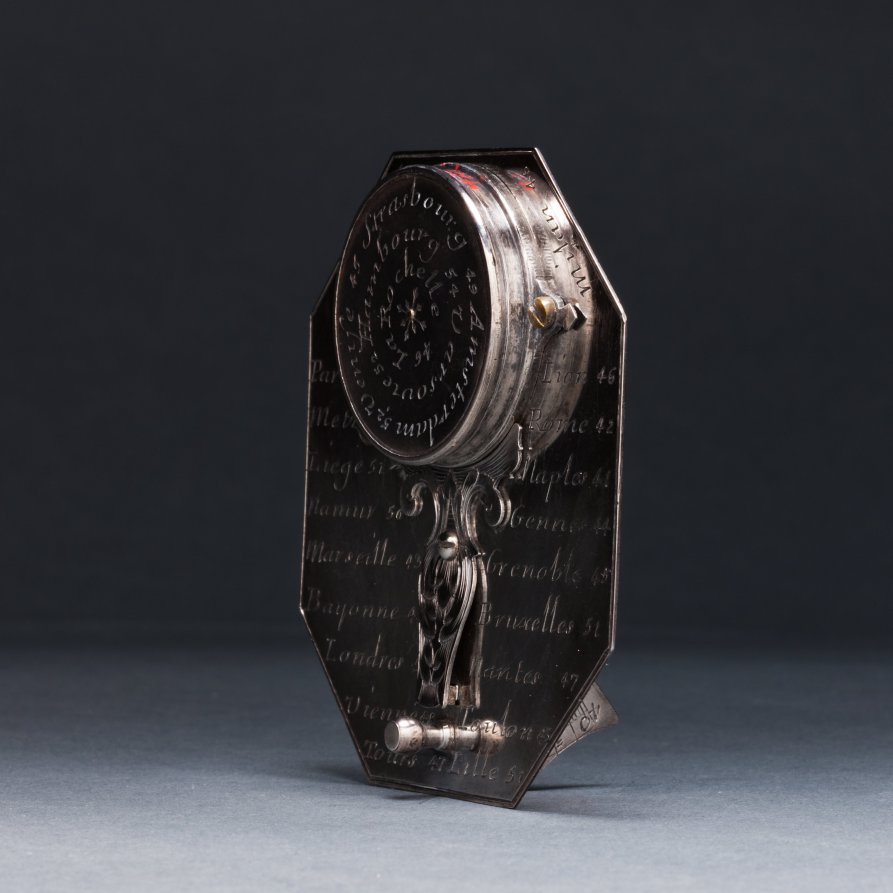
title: Butterfield Sundial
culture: France, 18th century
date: 1700s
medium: silver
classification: Silver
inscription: [Engraved signature above the compass in ribbon band]: "N. BION A Paris"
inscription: [Engraved on the face of the sundial]: “Pour 55° 4-5-6-7-8-9-10-11 50° IIII-V-VI-VII-VIII-IX-X-XI 45° 5-6-7-8-9-10-11 40° -VI-VII-VIII-IX-X-XI'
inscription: [Engraved on the other side]: "Pour 55° -8-7-6-5-4-3-2-1-0 50°-VIII-VII-VI-V-IIII-III-II-I 45°-8-7-6-5-4-3-2-1 40°-VII-VI-V-IIII-III-II-I"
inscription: [Engraved around the compass]: “NORD-OUEST-SUD-EST”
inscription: [Engraved on the back of the sundial]: “Turin 44 Milan 46 Paris 49 Lion 46 Metz 49 Rome 42 Liege 51 Naples 44 Namur 50 Gennes 44 Marseille 43 Grenoble 45 Bayonne 43 Bruxelle 51 Londres 52 Nantes 47 Vienne 48 Toulon 43 Tours 47 Lille 51”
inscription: [Engraved around the back of the compass]: “Venise 45 Strasbourg 49 Amsterdam 52 Hambourg 54 Varsovie 52 La Rochelle 46”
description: Butterfield-type sundials are characterized by their adjustable gnomons, metal flaps that cast a shadow on the dial’s face to indicate the hour, and geographical indices. This sundial has a scale adjustable between latitudes of 40° to 60° north. The latitudes of 26 European towns are engraved on its back for quick reference. With an intricately engraved silver face, it would have functioned as a fashionable traveler’s accessory.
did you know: Butterfield-style sundials were named after Micheal Butterfield, an English scientific and mathematical instrument maker who worked in Paris between 1674 and 1724.